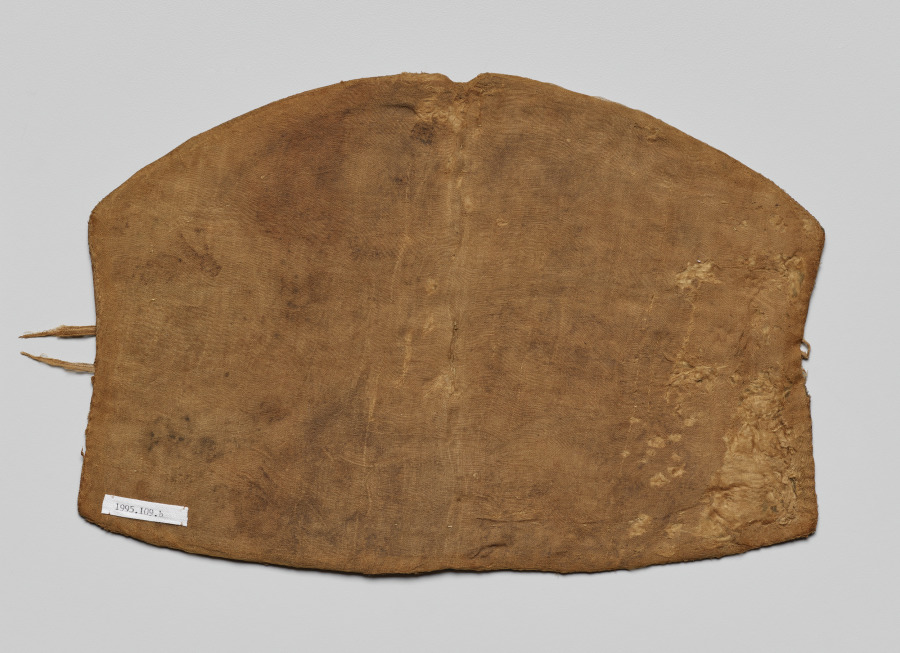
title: Headpiece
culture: China, Liao dynasty (907-1125)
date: 907–1125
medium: embroidery, silk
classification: Embroidery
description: These headpieces are embroidered with butterflies, birds, animals, flowers, leaves, and delicate vine scrolls. In general, the design is related to the theme of the lotus pond, best known from Liao tomb paintings. Paired ducks or geese swimming in water and looking in opposite directions seem to have become popular in the north of China before spreading further south and to Central Asia. On the other hand, recumbent animals looking back are a Central Asian image that migrated to northern China. Headpieces of this shape, intersected by two bands and secured by ties, have a long history in northern China. A gold replica was found in a tomb dating as early as 500–550.